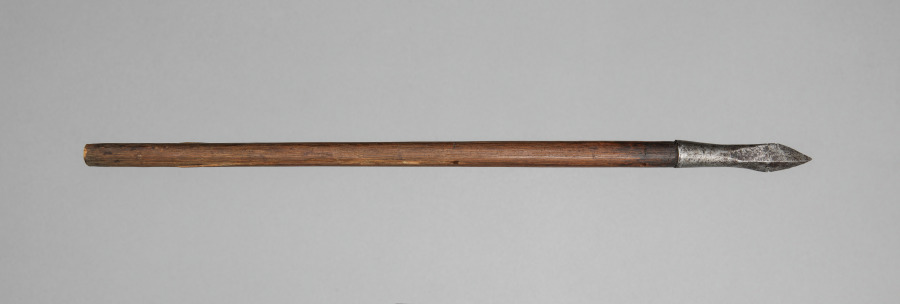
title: Crossbow Bolt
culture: Germany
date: 1500s-1600s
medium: wood, leather, steel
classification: Arms and Armor